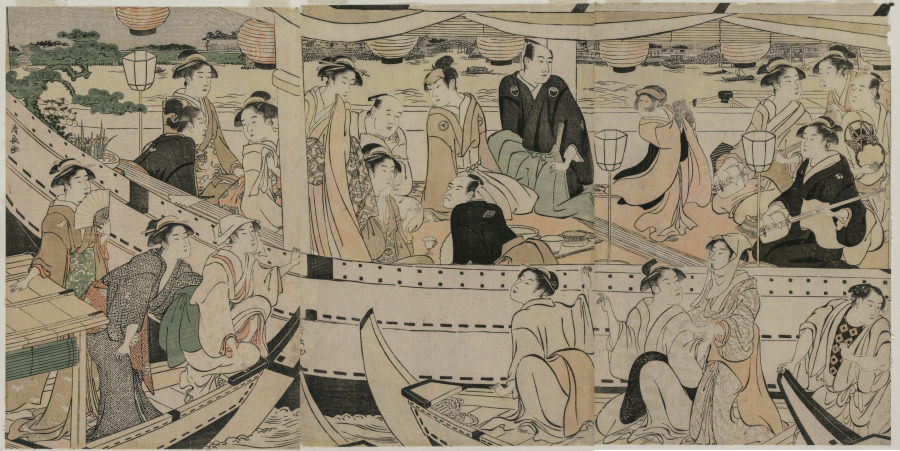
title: Boating Party on the Sumida River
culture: Japan, Edo period (1615–1868)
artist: Torii Kiyonaga (Japanese, 1752–1815)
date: 1789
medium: Triptych of color woodblock prints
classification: Print